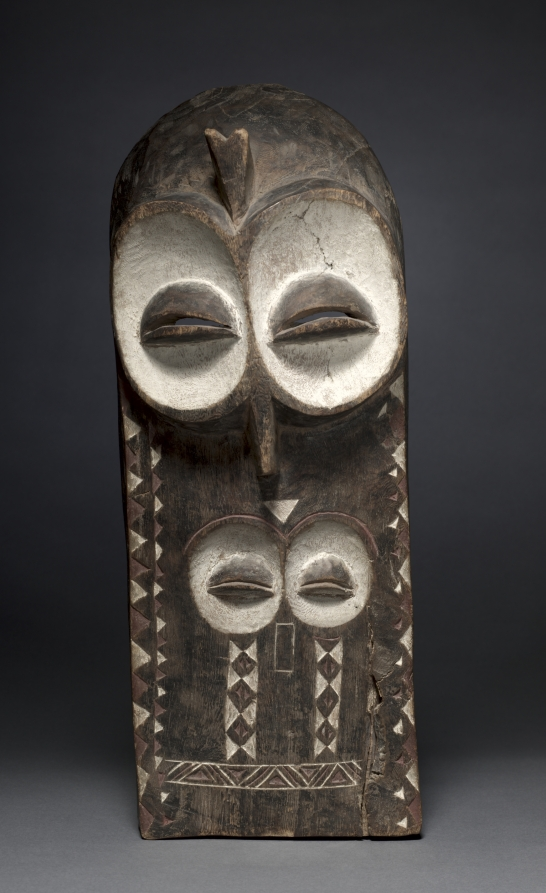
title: Mask (Emangungu)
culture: Africa, Central Africa, Democratic Republic of Congo, Bembe-style maker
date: possibly early 1900s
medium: Wood, kaolin, colorant, and iron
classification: Mask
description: Among the Bembe, anthropo-zoomorphic plank masks are used in circumcision rites called butende. They are worn along with a costume of bark and banana leaves by the initiated boys who beg for food in the village while living in seclusion in the forest. The sculpture’s short projections above the forehead are identified as an owl’s tufts. The two pairs of eyes could refer to divination.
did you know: White kaolin clay highlights the eyes of this carved wooden mask.